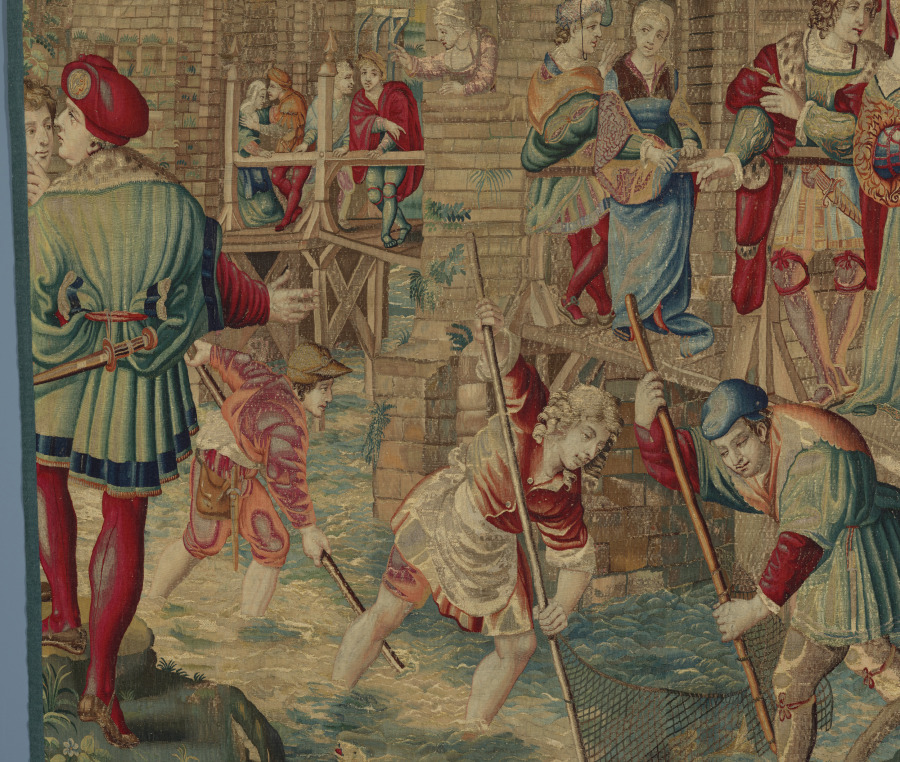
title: Spring: Fishing Scene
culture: France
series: Four Seasons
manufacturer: possibly by Gobelins Manufactory (France, Paris, est. 1662)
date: designed c. 1535, woven mid- to late 1600s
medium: Wool, silk, and gold filé: tapestry weave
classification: Tapestry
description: In this springtime scene, two fishermen wade in a river, dragging a net suspended between two poles. A noble couple on a bridge gestures toward other fishermen, who occupy the other side of this scene in other extant examples of this tapestry with a larger picture plane. In the background, townspeople walk on bridges that lead to the gateway of a town with brick walls and portals. In the far distance, farmers till the soil to sow new seeds, another typical activity associated with spring. The trees on the hills are just beginning to sprout new buds.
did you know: Spring was considered to be a season of courtship and romance; perhaps the gentleman on the bridge in the red cap is trying to catch the attention of the lady next to him.